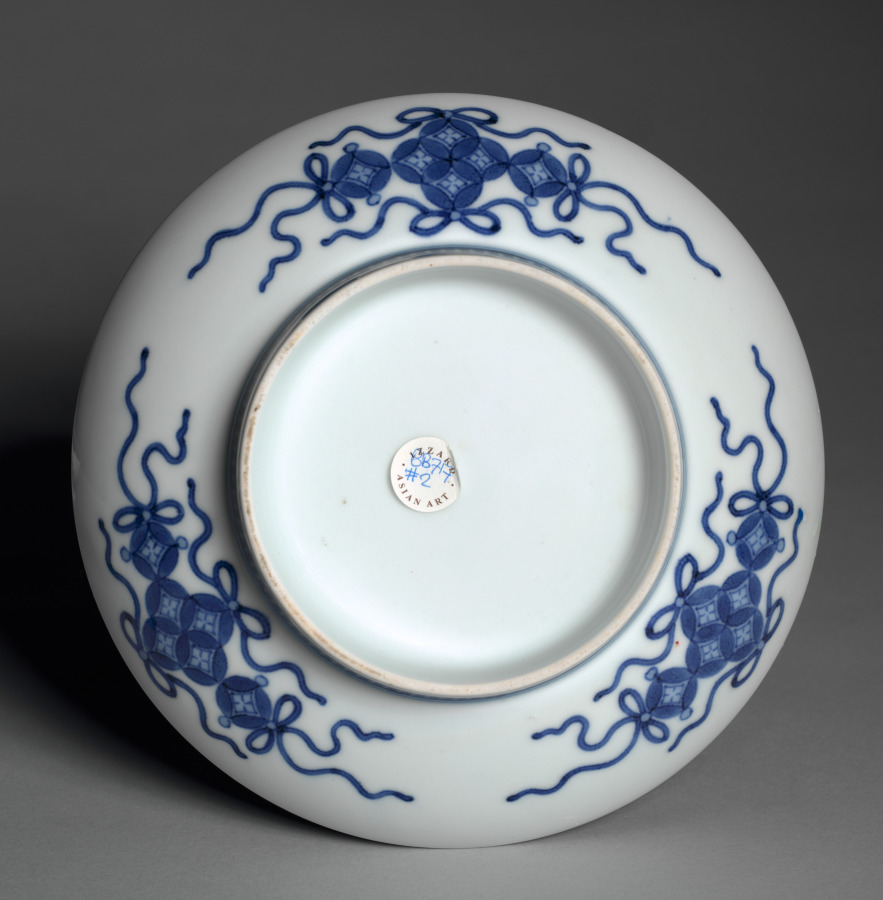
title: Dish with Maple Leaves in Waves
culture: Japan, Edo period (1615–1868)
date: late 1600s–early 1700s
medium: Porcelain with underglaze blue and overglaze color enamel (Hizen ware, Nabeshima type)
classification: Ceramic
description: The dish is an example of the finest type of Japanese porcelain, Nabeshima-type Hizen ware. It is decorated with maple leaves in iron-red and green and yellow enamels floating on the rough waters of a fast flowing stream in underglaze blue. It has been associated with the classical poetry motif of maple leaves on the Tatsuta River in Nara Prefecture.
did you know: This pottery type was named for the Nabeshima family, who established kilns to produce highly refined porcelain meant for diplomatic gifts.